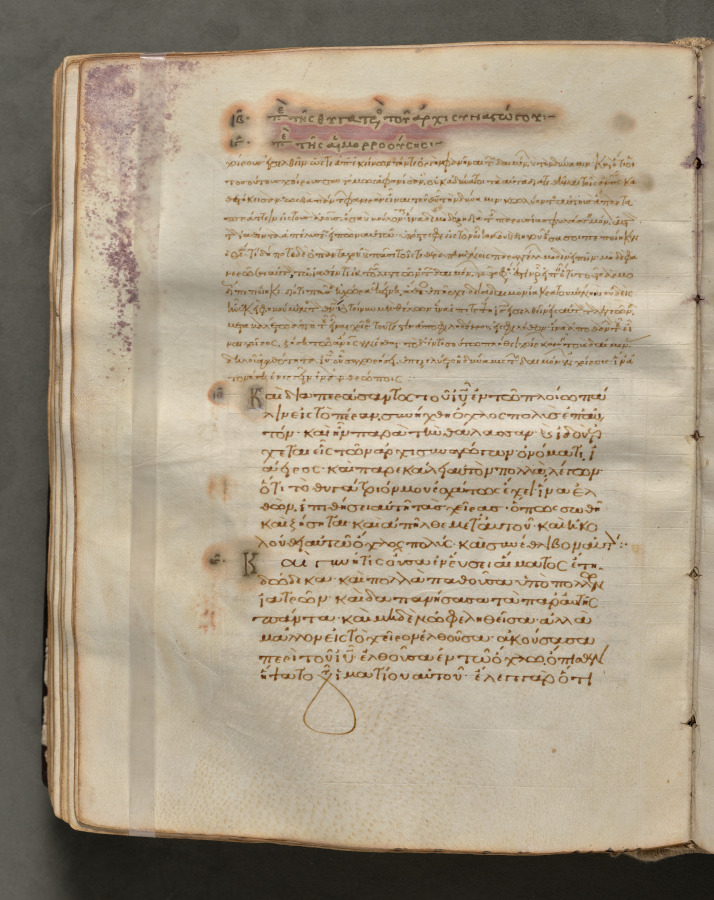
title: Text, folio 148 (verso), from a Gospel Book with Commentaries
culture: Byzantium, Constantinople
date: c. 1000–1100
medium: ink, tempera, and gold on vellum; leather binding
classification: Bound Volume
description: Each of the four gospels in this book opens on a page with brilliantly illuminated borders depicting the author of the text as well as birds-principally peacocks, symbols of the immortality of the soul-and fountains, representing the fountain of life and the salvation of the soul. This volume consists of 428 leaves with texts in Greek. Its level of sophistication suggests that it was probably written and decorated in a monastery in Constantinople.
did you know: Gospel Books were carried in procession through Byzantine churches.